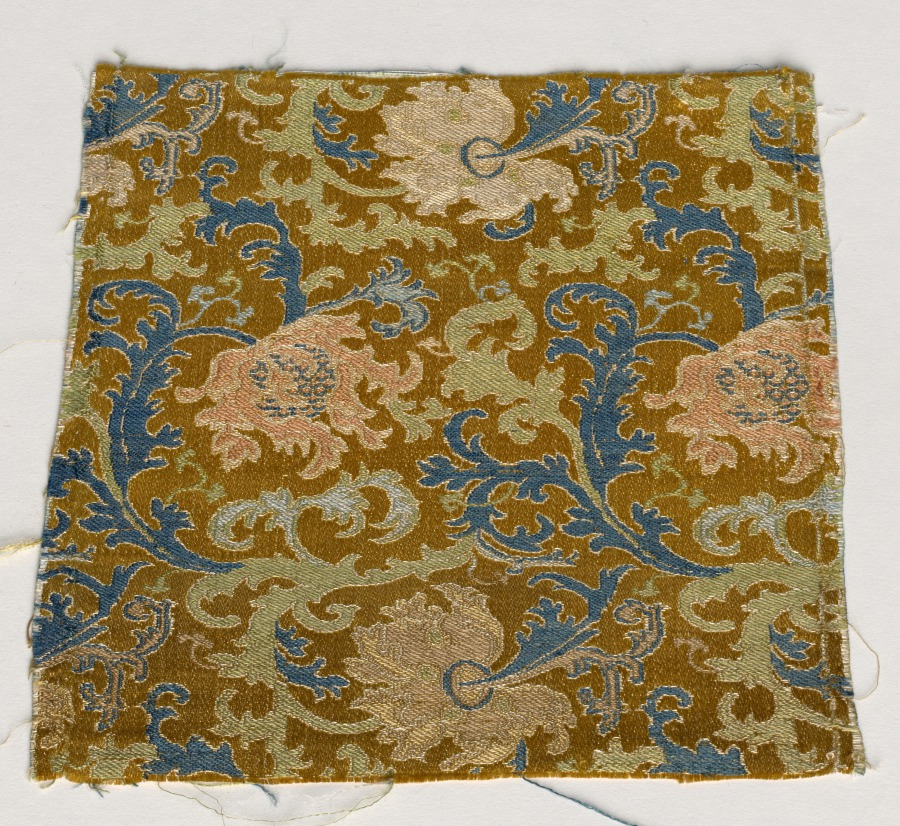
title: Fragment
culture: China, 18th century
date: 1700s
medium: satin ground; silk diasper weave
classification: Textile